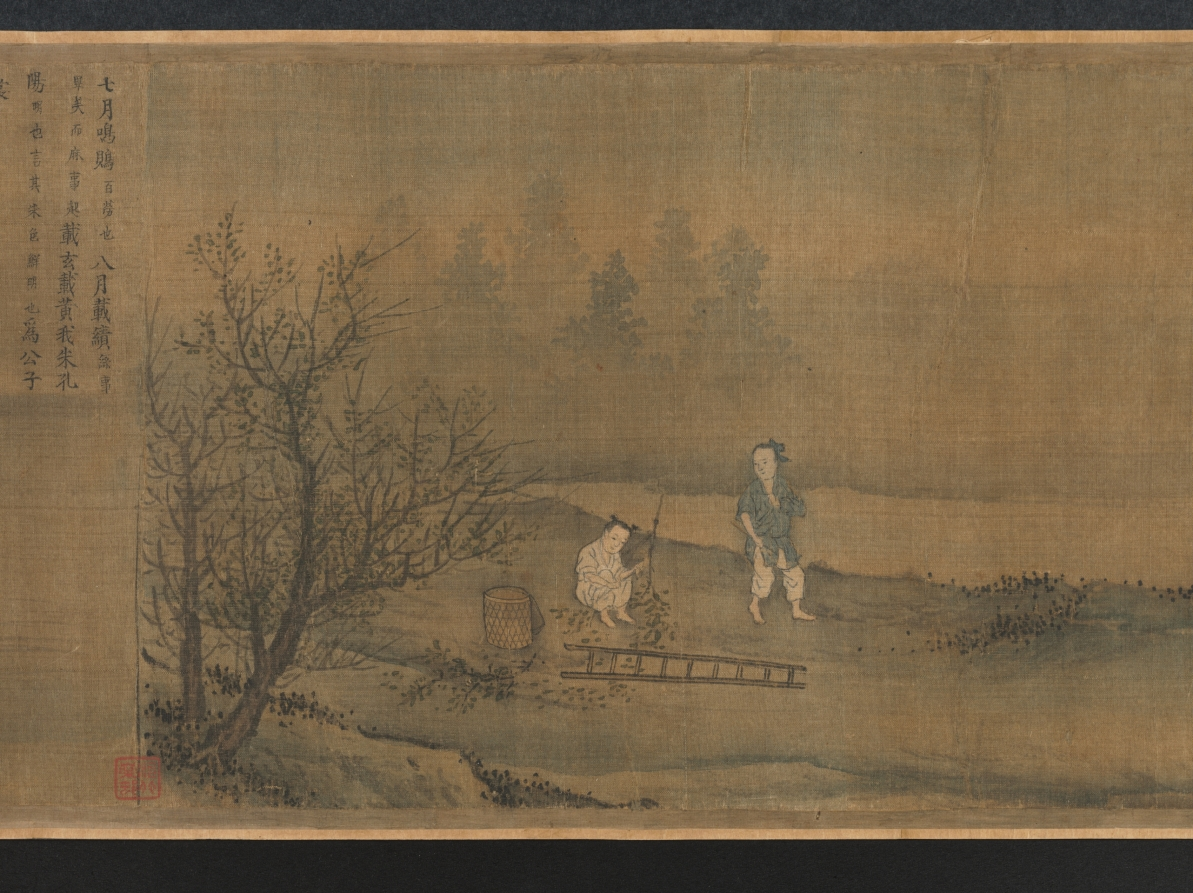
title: "Seventh Month" from the Odes of Bin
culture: China, Southern Song dynasty (1127-1279)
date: 1200s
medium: Handscroll; ink and color on silk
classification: Painting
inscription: Colophons: 1. [on the frontispiece] by the Qianlong emperor (dated 1741). 2. by Lu Wan (dated Zhengde dingchou, 1517). 2. by the Jiaqing emperor (dated 1807).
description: According to Confucian thought, the ruler looks after the well-being of his people which involves agricultural activities. Seventh Month from the ancient Odes of Bin in the Shijing (Book of Poetry) describes occupations throughout the year, including plowing, harvesting, hunting, making clothes, and observing rituals. The earliest illustrations of these Odes accompanied by text were commissioned by Southern Song emperor Gaozong (reigned 1127–1162). As the lower Yangzi delta had become the new seat of government, Gaozong had sets of these illustrations produced by court artists to revive the dynasty and convince the Confucian officialelite of his legitimacy to rule.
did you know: The Odes of Bin appears in the classic Shijing (Book of Poetry), an anthology of more than 300 poems, folk songs, and ceremonial hymns that were originally chanted to music.